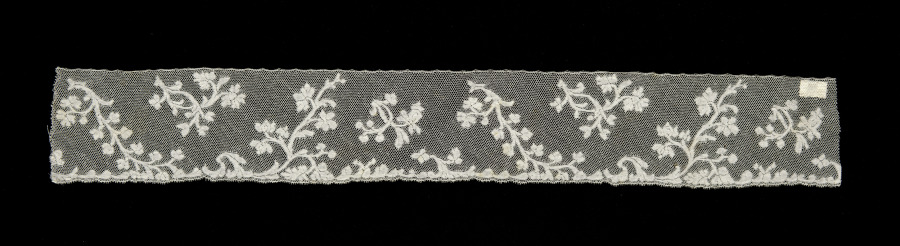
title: Lace Edging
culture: France or Flanders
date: 1700s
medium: Linen: bobbin lace (Valenciennes)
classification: Lace